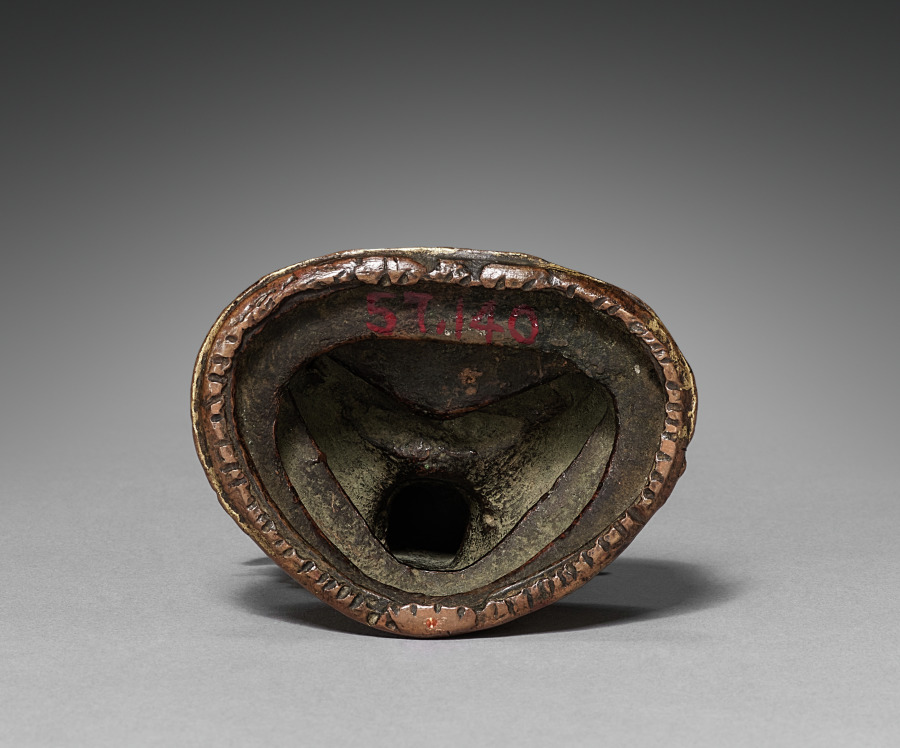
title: Manjuvara Turning the Wheel of the Law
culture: Nepal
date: 1300s–1400s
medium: gilded copper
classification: Sculpture